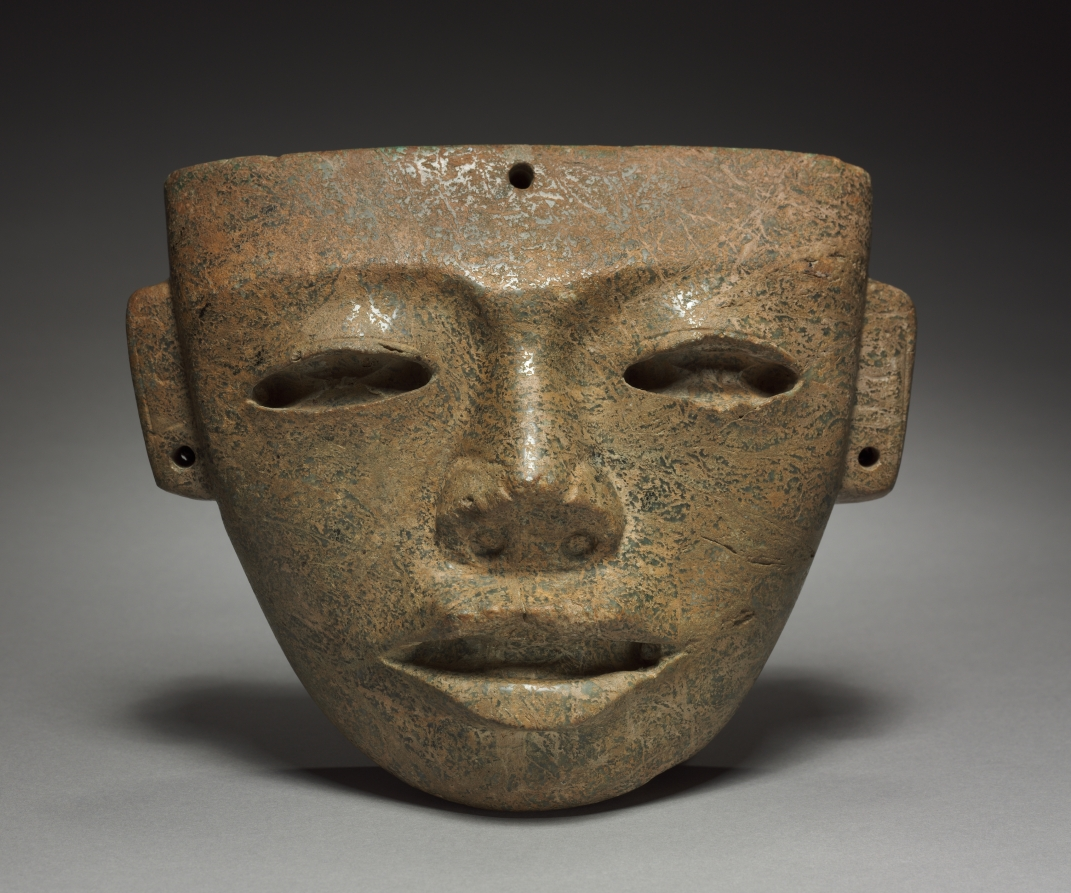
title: Mask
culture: Central Mexico, Teotihuacán, Classic period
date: 1–550 CE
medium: greenstone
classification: Stone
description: Many Teotihuacán masks were once tied to something via holes on the back--perhaps a body-shaped form dressed in garments, ornaments, and a headdress that identified the figure. The stone masks’ eyes and mouths once held inlays representing irises, pupils, and teeth.